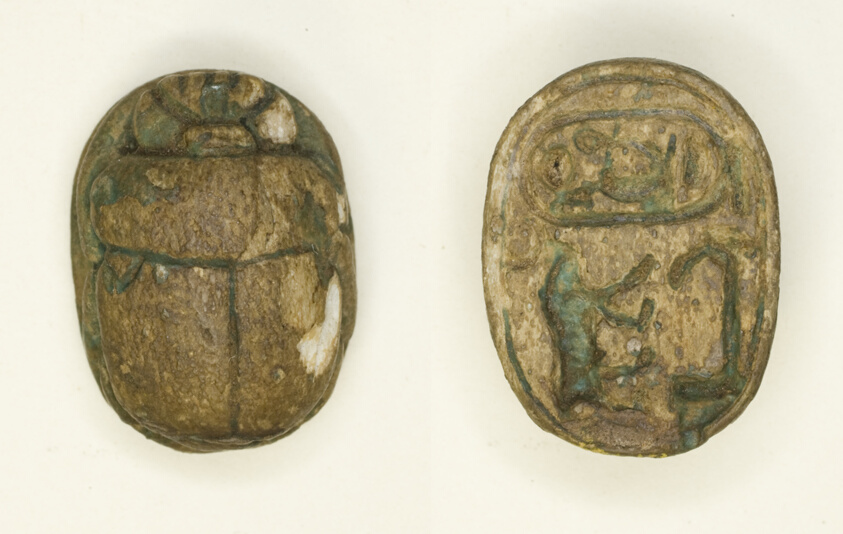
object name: Costume and Accessories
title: Scarab: Nebmaatra (Amenhotep III)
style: new kingdom, ancient, eighteenth dynasty, egyptian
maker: Egyptian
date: New Kingdom, Dynasty 18, Reign of Amenhotep IIII (about 1390–1352 BCE)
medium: Faience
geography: Egypt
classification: scarab; ancient art; costume; faïence (composite material)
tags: Hieroglyphs, insects, cartouches, kings, king, pharaohs, bulls